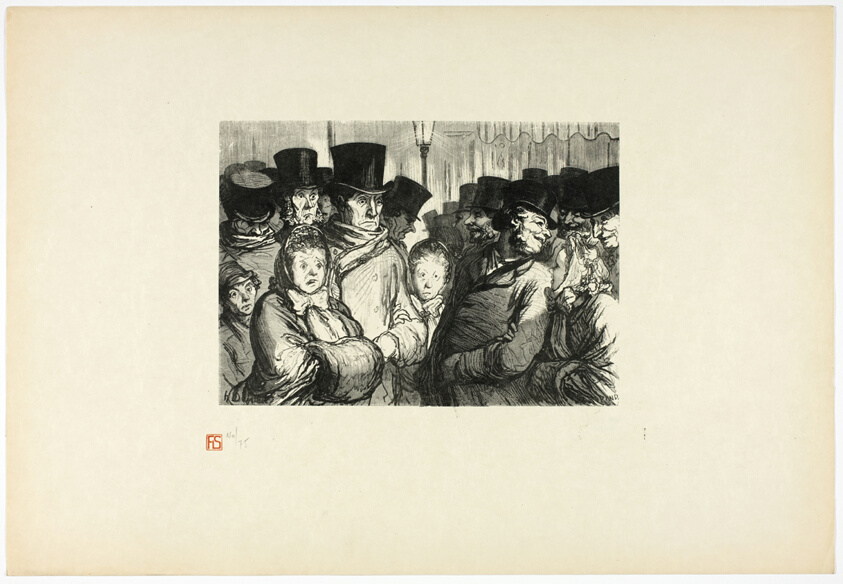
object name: Print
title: Boulevard du Temple à minuit, from Tirage Unique de Trente-Six Bois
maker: Charles Maurand (French, 1824-1904); after Honoré Victorin Daumier (French, 1808-1879); printed by François Louis Schmied (Swiss, 1873-1941); published by Jules Meynial (French, 20th century)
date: 1863, printed 1920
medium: Wood engraving on cream Japanese paper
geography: France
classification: wood engraving; print; prints and drawing